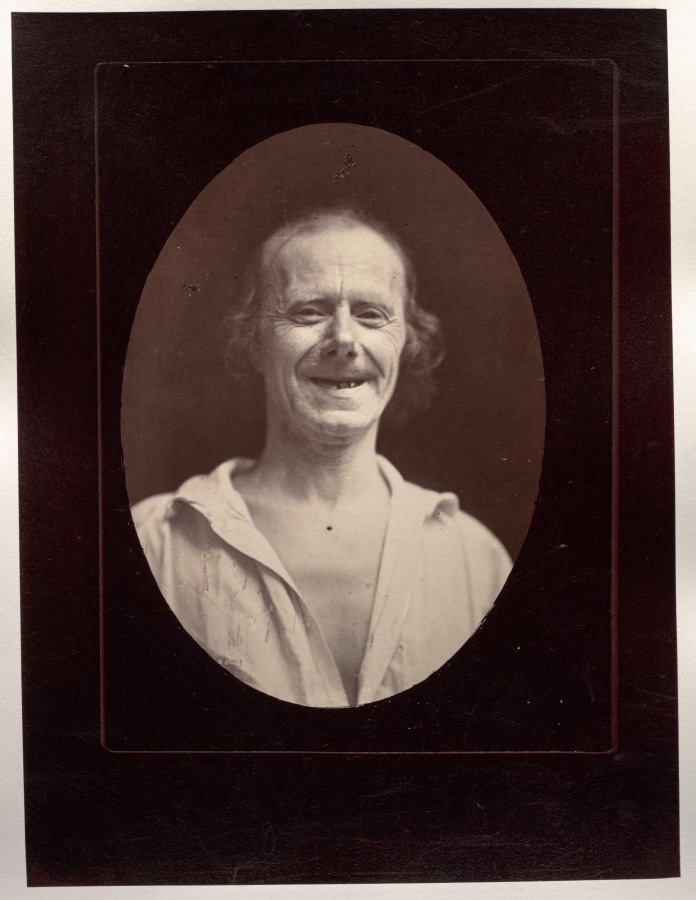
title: Figure 32: Natural laughter by the voluntary contraction of the two large zygomatics and the lower palpebral orbicularis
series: The Mechanism of Human Physiognomy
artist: Guillaume-Benjamin-Amand Duchenne (de Boulogne) (French, 1806–1875)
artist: Adrien Tournachon (French, 1825–1903)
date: c. 1856, printed 1862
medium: Albumen print from glass plate negative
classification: Photograph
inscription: On the verso, lower left, in graphite, “fig. 32”.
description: Duchenne embarked on the first scientific, systematic exploration of the physiology of human facial expression and hoped, through photographs of the experiments, to teach artists how to portray those emotions. Here, he has photographed a subject’s natural smile and described the muscles creating it. In subsequent photographs, he used an electrode to contract one of the muscles that convey that same emotion.